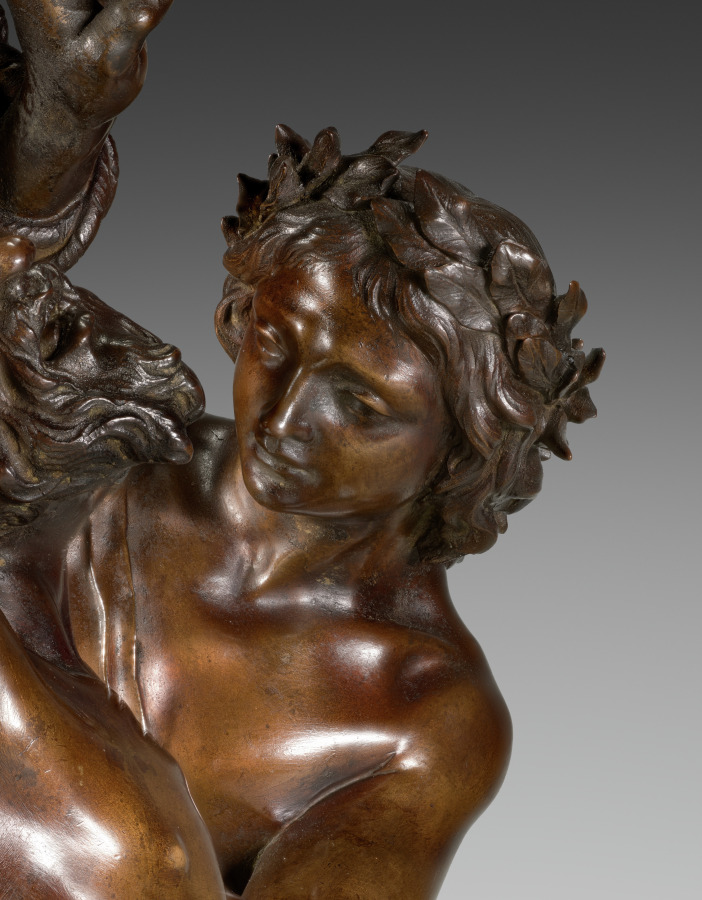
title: Apollo Flaying Marsyas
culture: Italy, Florence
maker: Giovanni Battista Foggini (Italian, 1652–1725)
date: c. 1691–1700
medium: Bronze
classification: Sculpture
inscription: 1136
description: According to myth, the overconfident satyr (half-goat, half-man) Marsyas challenged Apollo, god of the arts, to a musical duel. The defeated Marsyas was tied to a tree and skinned alive in punishment for his pride. Foggini’s bronze captures the moment after Apollo’s victory as the bound Marsyas cries out in agony while the god makes the first incision. The satyr’s anguish is echoed by the gnarled branches; Apollo’s wrath is manifested in his billowing drapery.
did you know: The lyre with which Apollo outperformed Marsyas can be seen between his feet, cast down upon his victory.